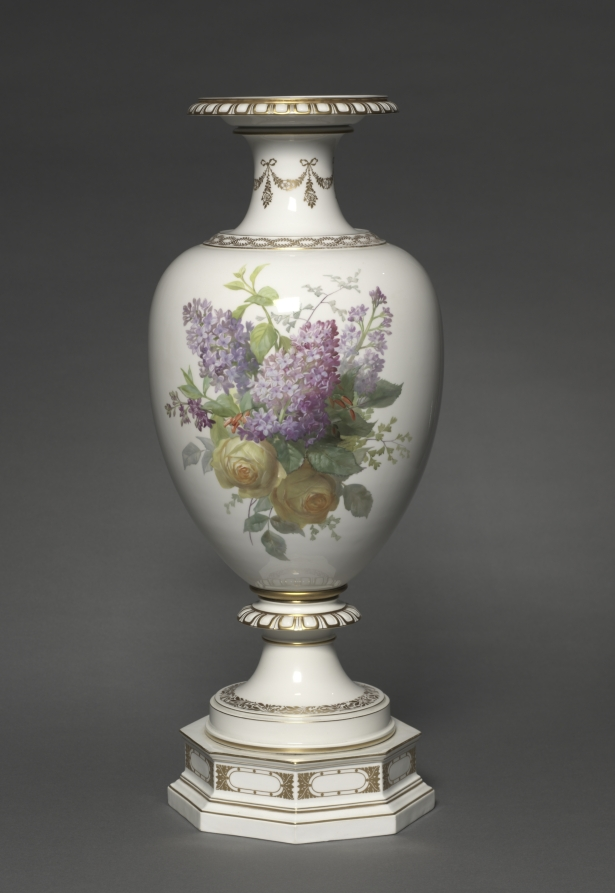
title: Vase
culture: Germany, 20th century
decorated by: Carl Bonnenfaut (German)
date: 1910 (probably)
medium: porcelain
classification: Ceramic